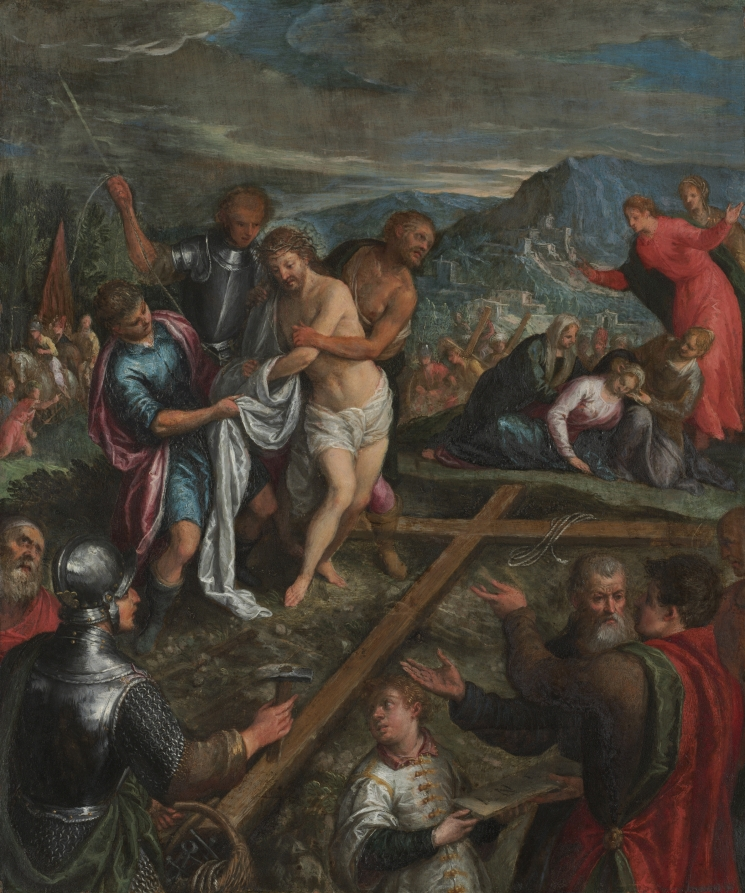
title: Preparation for the Crucifixion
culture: Northern Italy, early 17th century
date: early 1600s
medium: oil on copper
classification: Painting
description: Despite the religious subject, the scale and intricate detail indicate that this painting was not for a church setting. Instead, as an independent work of art, a collector would have admired its artistry and unusual combination of Italian and northern European traditions. Likewise, the subject’s novelty would have intrigued a sophisticated patron. Neither Christ’s disrobing before the Crucifixion nor the debate over the plaque identifying him as Jesus of Nazareth, King of the Jews, are common subjects in the Renaissance. Who made this work remains a mystery. The copper surface, complex composition, and atmospheric landscape imply a painter from north of the Alps, as does Christ’s sinuous body. However, the drapery, rich colors, and figures at lower right stem from Venetian Renaissance art.